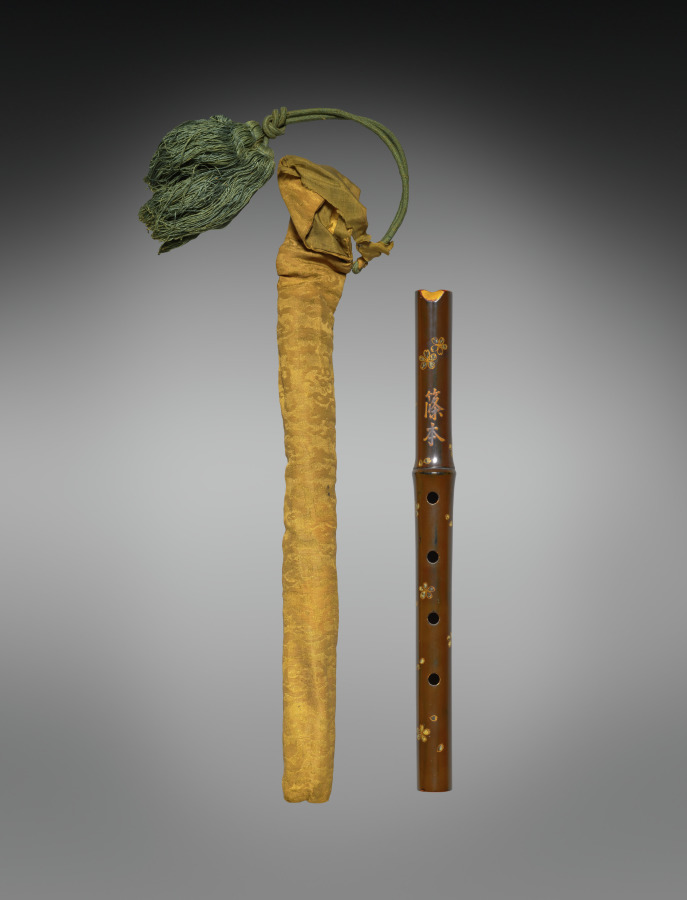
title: End-blown Flute (Hitoyogiri)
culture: Japan, Meiji period (1868–1912)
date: late 1800s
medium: Lacquered bamboo with gold and silver maki-e (sprinkled powder designs)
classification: Musical Instrument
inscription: 篠本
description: The hitoyogiri 一節切 is considered one type of shakuhachi 尺八 bamboo flute and was popular in the 16th and 17th centuries. It is smaller and of weaker sound than the better known fuke 普化, and was thus known as a "small bamboo" or kotake 小竹, during a brief 19th-century revival. The node of the bamboo is positioned between the four finger holes on the front, and the thumb hole at the top of the back. This one has a design of cherry blossoms and scattered petals.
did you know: The name of this flute, hitoyogiri 一節切 comes from the fact that it has a single node in the bamboo from which it is made.